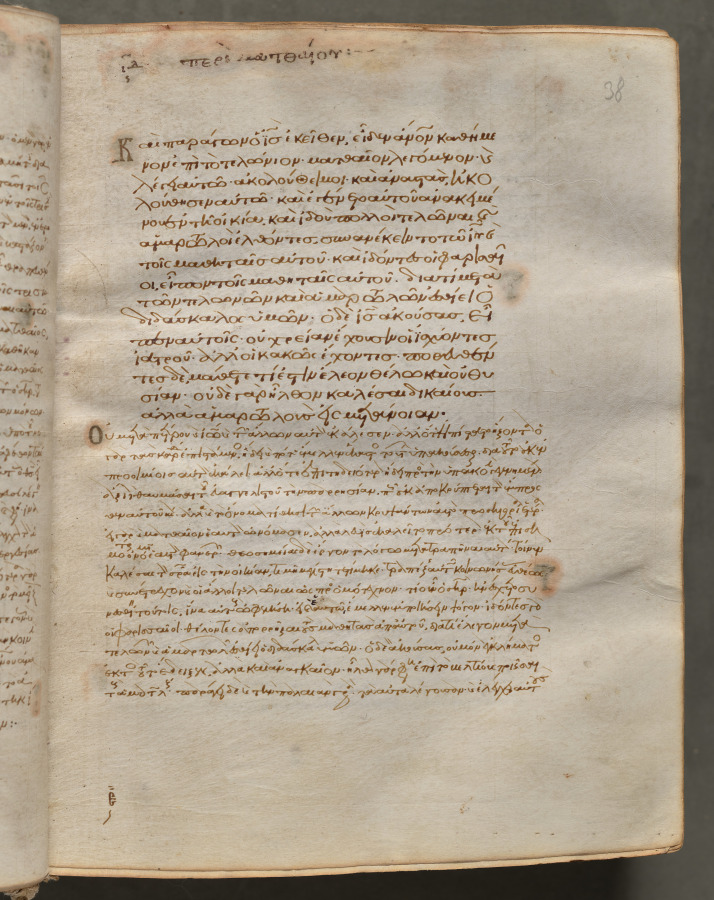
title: Text, folio 38 (recto), from a Gospel Book with Commentaries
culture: Byzantium, Constantinople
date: c. 1000–1100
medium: ink, tempera, and gold on vellum; leather binding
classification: Bound Volume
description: Each of the four gospels in this book opens on a page with brilliantly illuminated borders depicting the author of the text as well as birds-principally peacocks, symbols of the immortality of the soul-and fountains, representing the fountain of life and the salvation of the soul. This volume consists of 428 leaves with texts in Greek. Its level of sophistication suggests that it was probably written and decorated in a monastery in Constantinople.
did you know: Gospel Books were carried in procession through Byzantine churches.